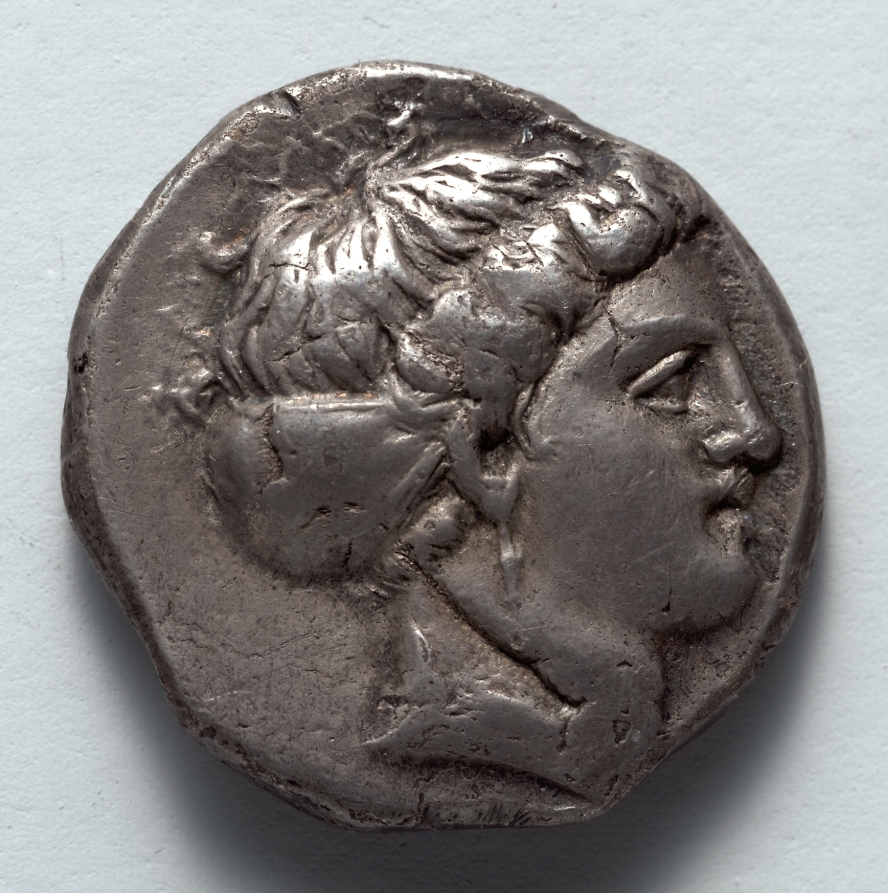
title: Stater: Head of Kore (obverse)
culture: Greek, minted at Metapontion (South Italy)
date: c. 340 BCE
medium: silver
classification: Coins